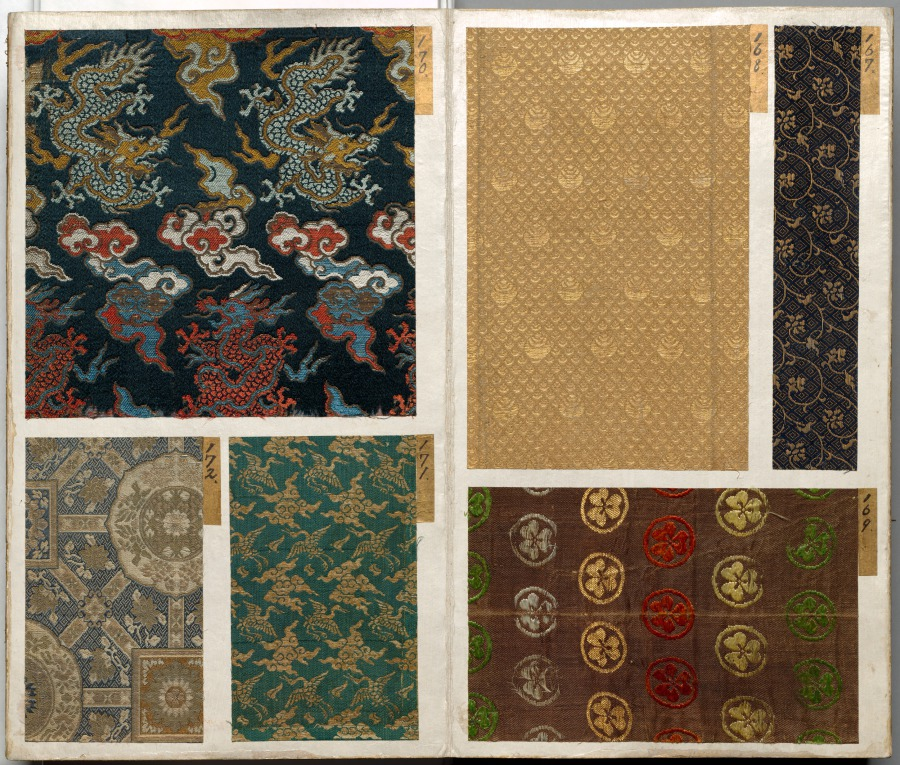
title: Album of Textile Samples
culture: Japan, Edo period (1615–1868)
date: 1600s-1700s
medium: silk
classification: Textile